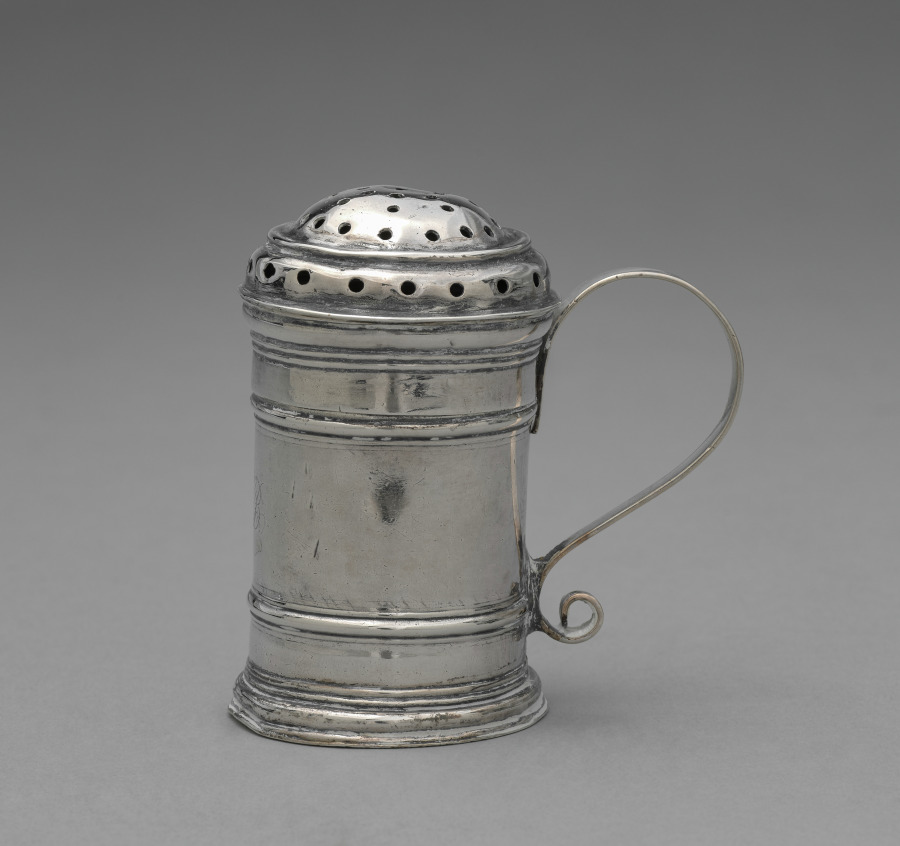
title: Caster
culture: America, Massachusetts, Boston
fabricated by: John Edwards (British)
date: c. 1715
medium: silver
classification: Silver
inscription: engraved "C" over "EE" in shaded block letters on bottom, and "FLB" (later) in bright-cut script on front, opposite handle.